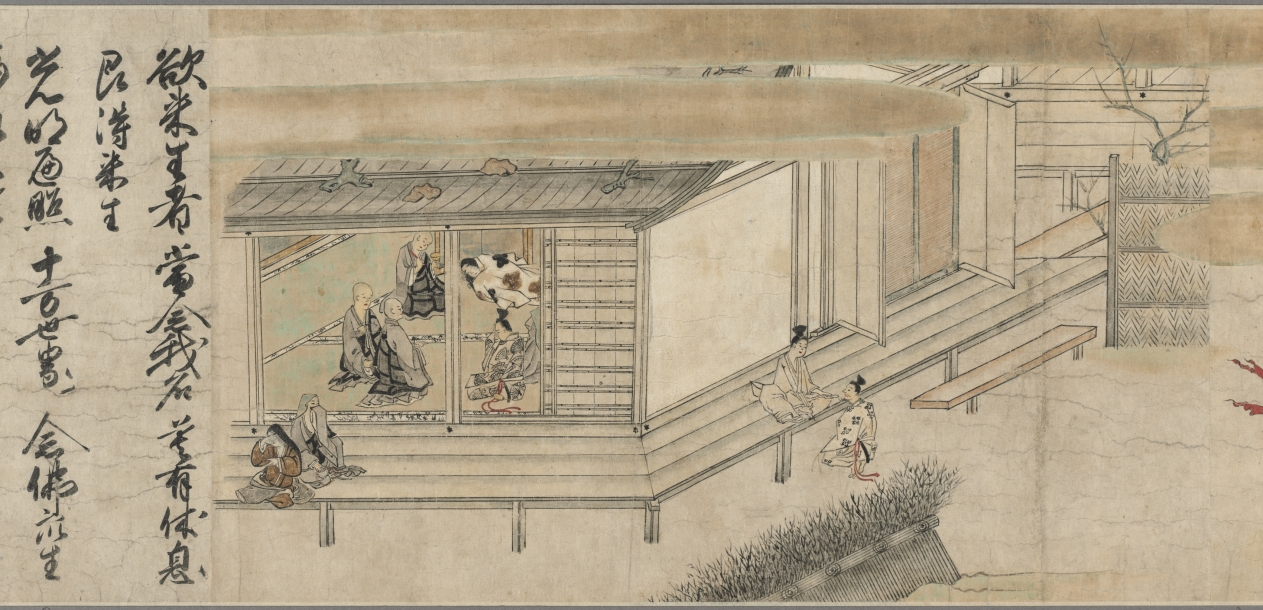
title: The Illustrated Miraculous Origins of the Yūzū Nenbutsu School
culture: Japan, Kamakura period (1185–1333)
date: early 1300s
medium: Handscroll; ink, color, and gold on paper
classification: Painting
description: This painting is the second of a set of two illustrated handscrolls. The first scroll depicts the biography of the Japanese Buddhist monk Ryōnin. This scroll begins with scenes of Ryōnin’s death and relates episodes illustrating the efficacy of following his teachings. Ryōnin asserted the total interconnectedness of all things and the spiritual benefit of chanting the name of the Buddha Amida for one another.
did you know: The other scroll from this two-scroll set belongs to the Art Institute of Chicago.